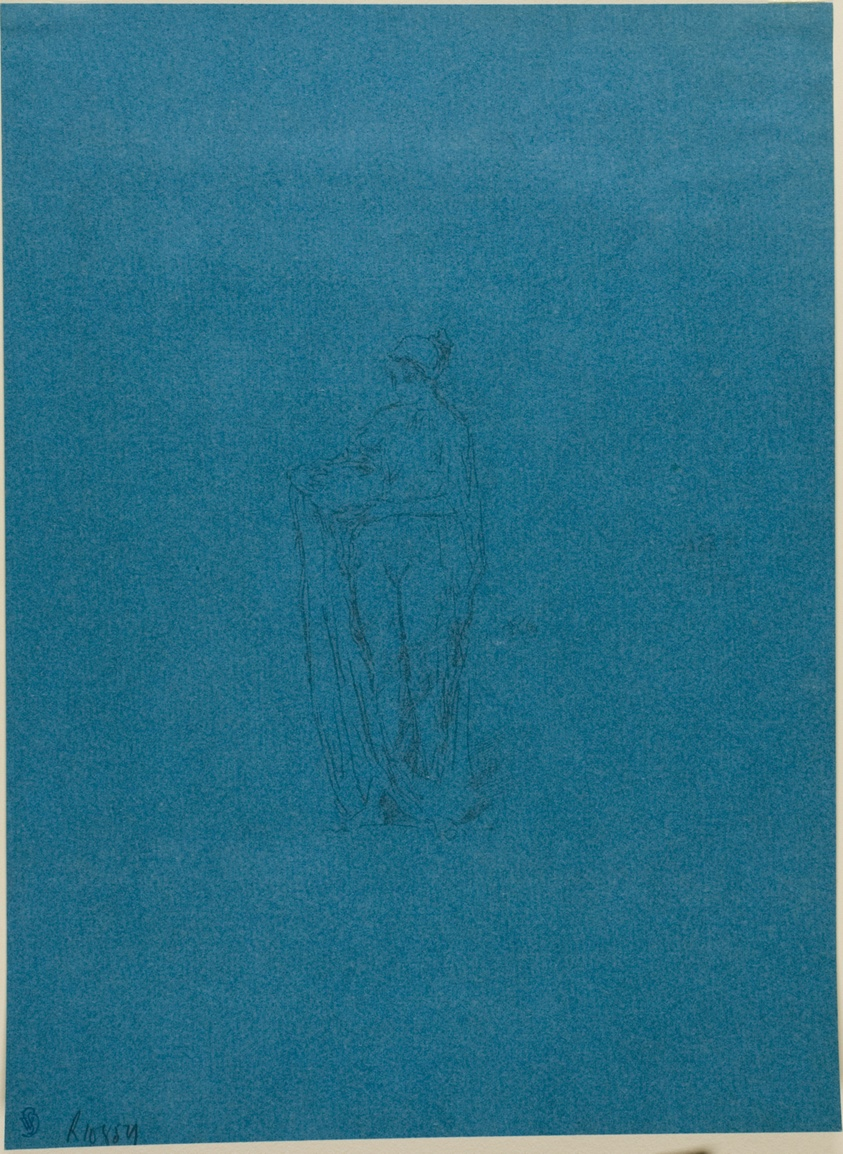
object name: Print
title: Girl with Bowl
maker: James McNeill Whistler (American, 1834-1903)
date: 1895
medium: Transfer lithograph in gray on blue wove Japanese vellum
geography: United States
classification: transfer lithograph; lithograph; print; prints and drawing